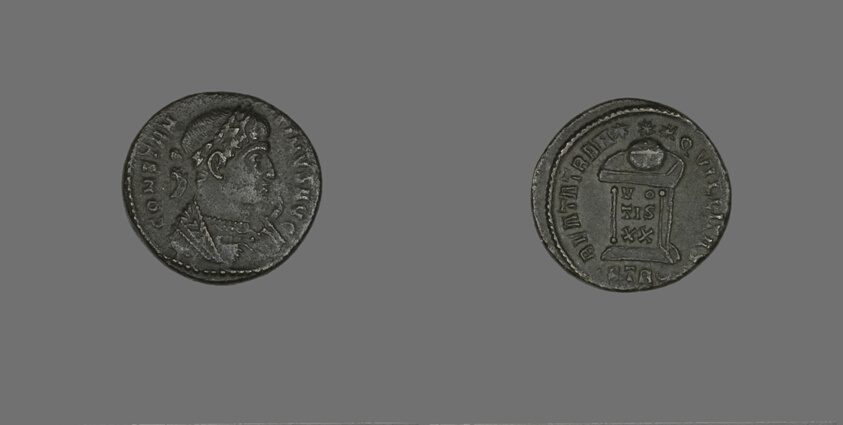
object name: Coin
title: Coin Portraying Emperor Constantine I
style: roman (ancient, style or period), ancient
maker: Roman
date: 307-337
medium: Bronze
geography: Roman Empire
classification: coin; ancient art